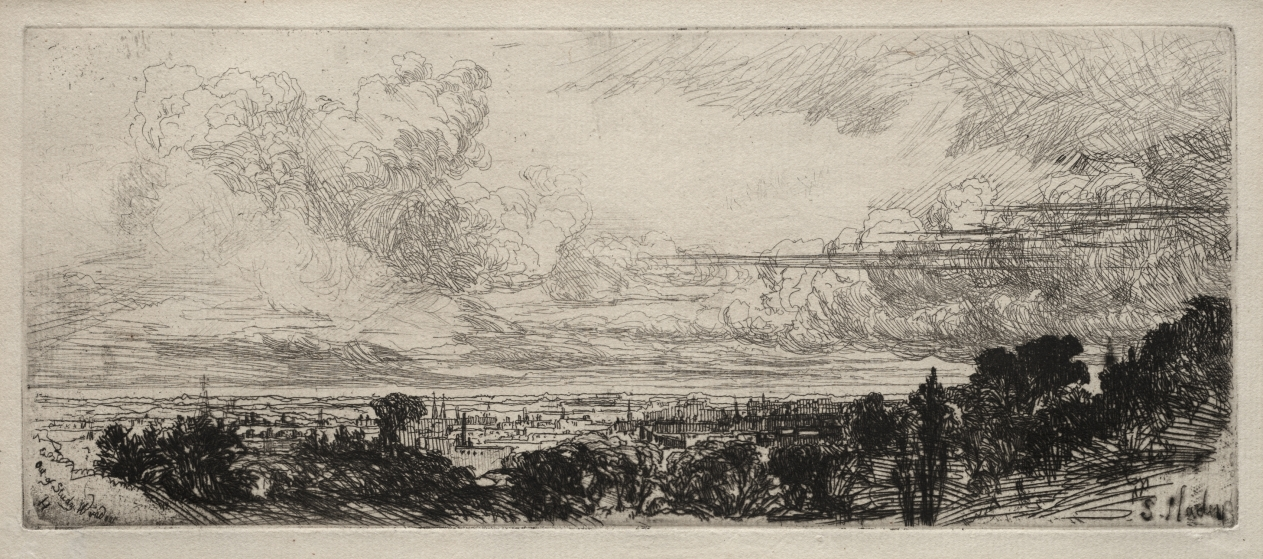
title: Out of Study Window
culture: England, 19th century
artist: Francis Seymour Haden (British, 1818–1910)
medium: etching and drypoint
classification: Print